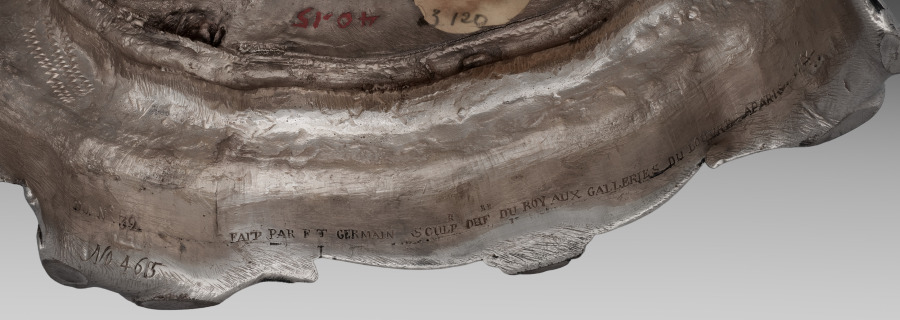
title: Candelabrum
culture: France, Paris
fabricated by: François Thomas Germain (French, 1726–1791)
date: 1757–58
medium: silver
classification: Silver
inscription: [Charge mark of Eloy Brichard , 1756−1762, beneath base]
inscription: [Warden's mark for Paris, 1757-1758, beneath base]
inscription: [Discharge mark for work intended for export, 1756−1775, on base]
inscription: [Hallmarks for Saint Petersburg, on base]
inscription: [Assayer mark of Ivan Frolov, on base]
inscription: [Russian standard of the French silver, on base]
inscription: [Maker’s mark of Francois-Thomas Germain, master silversmith on October 16, 1748, beneath drip pan one each of three bobeches]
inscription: [Charge mark Of Eloy Brichard, 1756−1762, beneath drip pan one each of three bobeches]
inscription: [Discharge mark for work intended for export, 1733 (?)−1775, beneath drip pan one each of three bobeches]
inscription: [Warden's mark for Paris, 1757−1758, beneath drip pan one each of three bobeches]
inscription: [Assayer mark of Ivan Frolov, beneath drip pan of one of three bobeches]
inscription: [Russian standard of French silver, beneath drip pan of one of three bobeches]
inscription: [Charge mark for large work of Eloy Brichard, 1756−1762, on candelabra bayonet attachment]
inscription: [Discharge mark for work intended for export, on candelabra bayonet attachment]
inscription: [Beneath base]: “Fait. Par. F. T. Germain. Sculp[teu]r. Orf[ev]re. Du Roy. Aux. Galleries. Du Louvre. A Paris. 1758”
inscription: [Beneath base]: "Du no.32"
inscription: [Beneath base]: "No 465"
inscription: [Engraved Russian Imperial coat-of-arms, beneath base]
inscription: [Modern inscription in a round paper label, beneath base]: “[?]8” [printed in black]: “3120” [written in pencil]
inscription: [Modern inscription in a rectangular paper label, beneath base]: “…IN/FRANCE” [printed in black]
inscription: [Modern inscription in a rectangular paper label, beneath base]: “46” [written in black ink]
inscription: [Engraved cipher composed with two “M”’s (?) surmounted by a royal crown, on base]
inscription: [Engraved, on base]: "No 465"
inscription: [Engraved, on base]: "du No 32"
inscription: [Engraved cipher composed with two “M”’s (?) surmounted by a royal crown, on one bobeche]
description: This candelabrum is part of a pair. Its design blurs the line between function and decoration. The arms twist and curve, appearing as flower stems while physically supporting the candles. Though this visual unity is typical of the Rococo style, the influence of the rising neoclassical style is evident in the allegorical scenes of light that decorate each candelabra’s stem.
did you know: These candelabra are part of a dinner service sent from Paris, France, to Saint Petersburg, Russia, in two separate shipments, the first of which contained 270 objects for 8 dozen place settings.